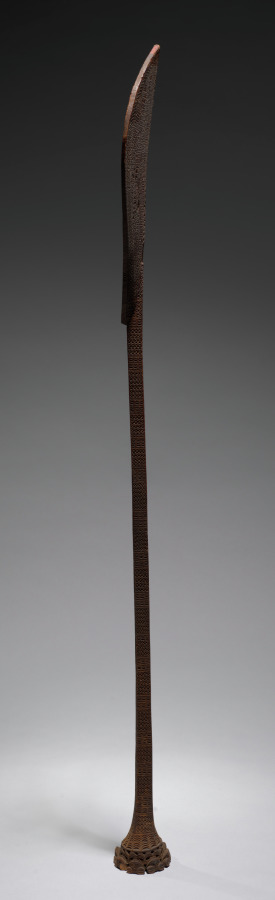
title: Ceremonial Paddle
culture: Polynesia, Ra'ivavae, Austral Islands, 19th century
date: 1800s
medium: wood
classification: Sculpture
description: Fine, chip-carved patterns cover the blades and shafts of Austral Islands ceremonial paddles. Squatting human figures carved around the butt are called tiki tiki tangata, meaning man-gods. The shafts of early paddles are usually round in cross-section; 19th-century examples are sometimes square. The function of the intricately carved Austral Islands paddles is uncertain. They may have been displayed on ceremonial occasions, such as dances, pageants, ancestral rituals, or inaugurations.